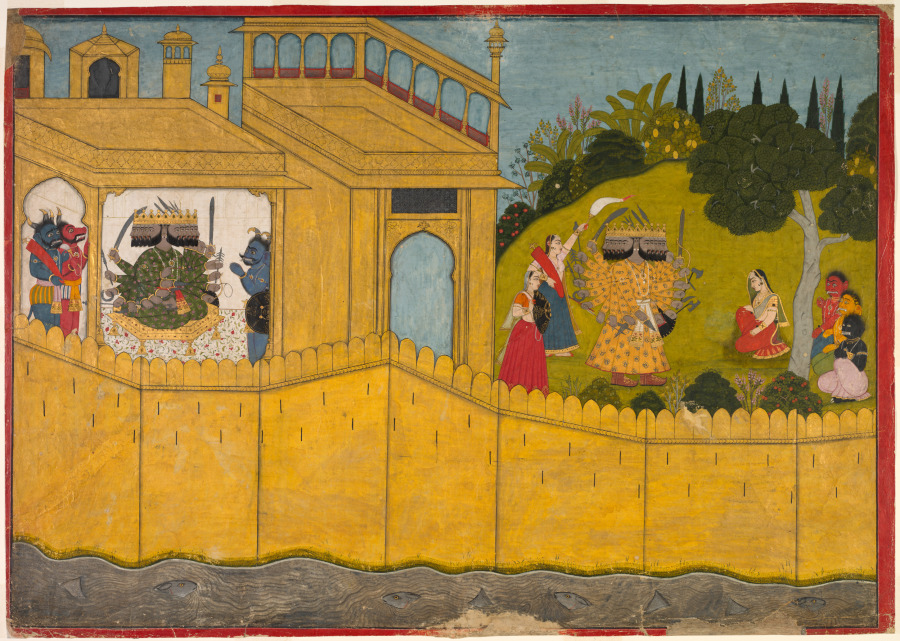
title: Ravana addresses Sita in the garden of Lanka, from Chapters 53 and 54 of the Aranya Kanda (Book of the Forest) of a Ramayana (Rama’s Journey)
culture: Northern India, Pahari kingdoms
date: c. 1725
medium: Gum tempera, gold, and silver on paper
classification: Painting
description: The viewer is cut off from Lanka by the surrounding sea and the city’s golden walls in this expansive composition probably intended for courtly display This choice of perspective cleverly emphasizes the captivity of the Sita, faithful wife of the hero Rama. She kneels beneath an ashoka tree, guarded by demonesses. The princess’s abductor, the 10-headed and 20-armed demon lord of Lanka, Ravana, appears twice in the image. In the palace, he consults his council of minions. At the right, he hears Sita’s refusal to marry him. Ravana neither harms her, nor sets her free.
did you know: Ravana’s wives take the forms of beautiful women and fearsome demonesses.